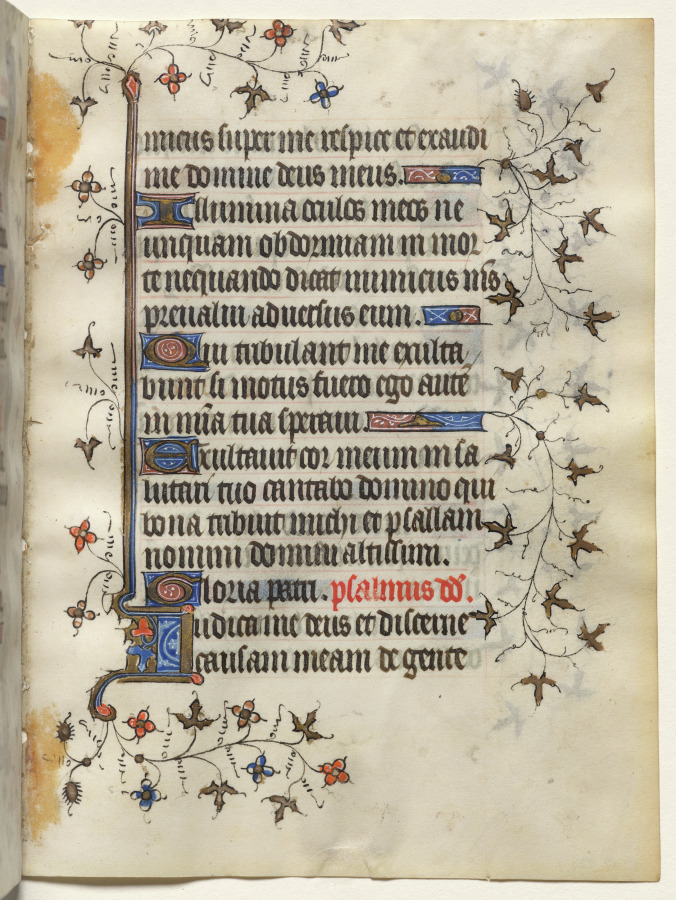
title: Bifolio from a Book of Hours: Text (verso)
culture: France, Paris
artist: workshop of Boucicaut Master (French, Paris, active about 1410–25)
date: c. 1415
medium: ink, tempera, and gold on vellum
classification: Manuscript